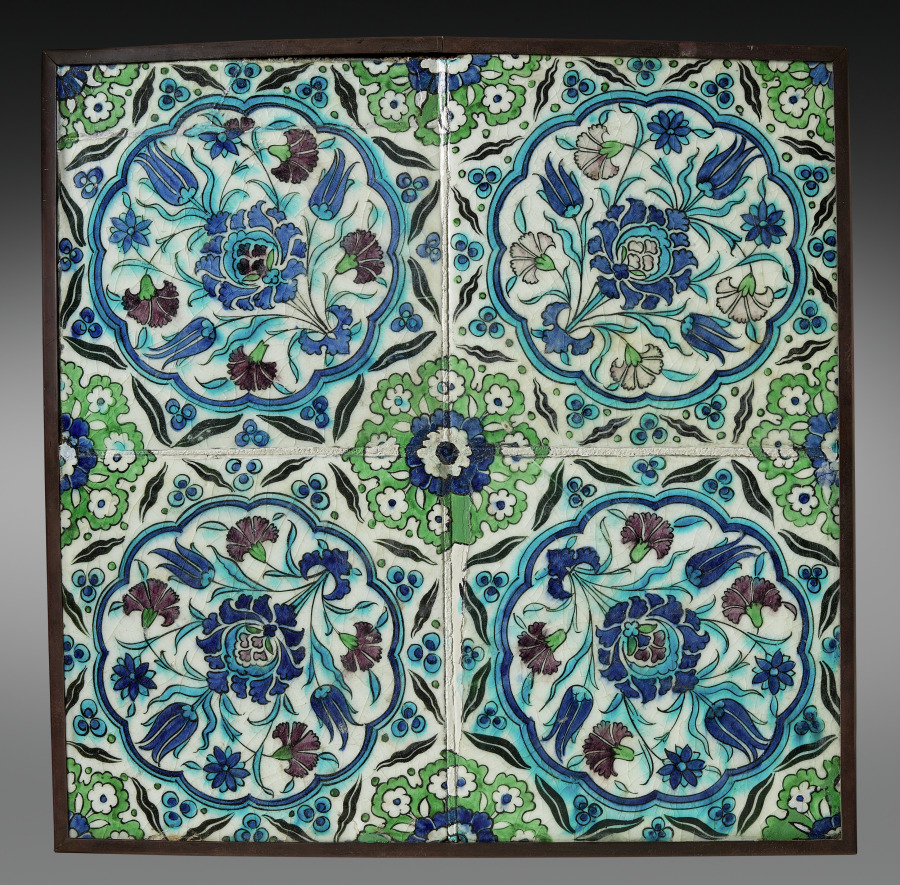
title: Wall Tiles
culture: Turkey (Iznik), Ottoman Period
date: 1600s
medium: fritware with underglaze-painted design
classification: Ceramic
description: These four square tiles are each adorned with a floral spray of tulips, carnations, and a large hybrid palmette, set inside a twelve-lobed circular medallion. It is surrounded by an eight-pointed star made of pairs of wavy lines. Where the four tiles are joined, another complete medallion with a floral motif and a cobalt blue center is formed.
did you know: Iznik was the town which manufactured tiles for imperial buildings of the Ottoman sultans.